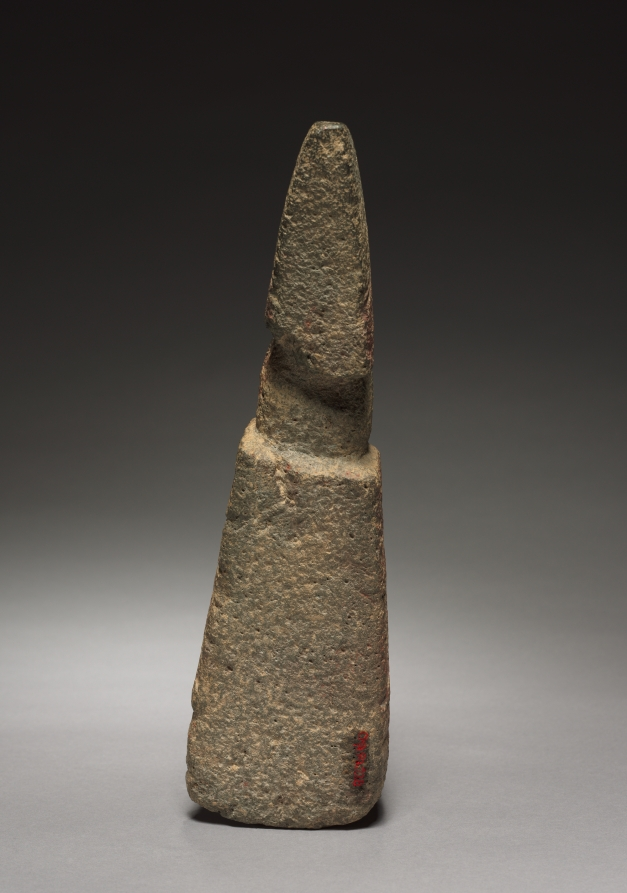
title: Bird Hacha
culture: Mexico, Veracruz, El Tajín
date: 300–900 CE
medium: gray volcanic stone with red pigment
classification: Sculpture